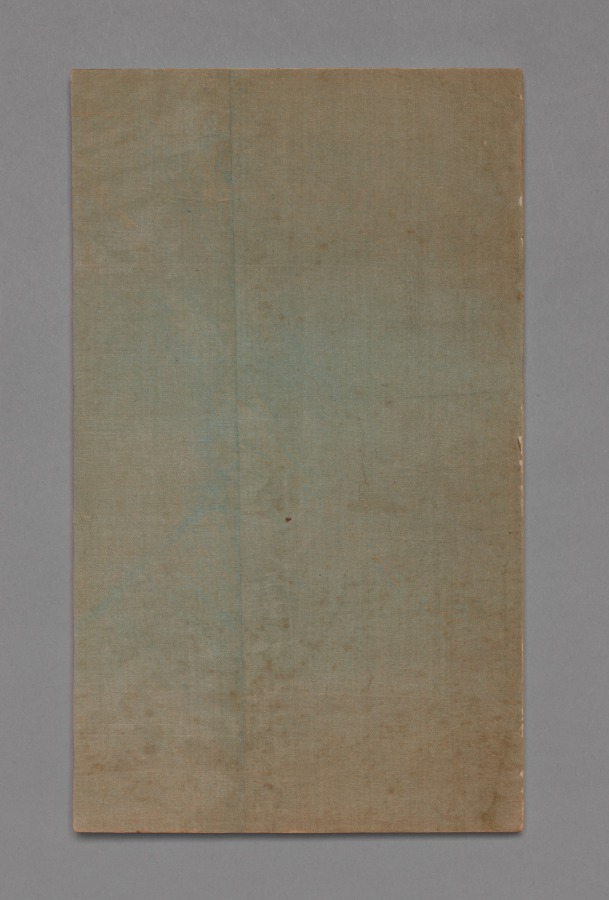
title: Ten Bamboo Studio Painting and Calligraphy Handbook (Shizhuzhai shuhua pu): Orchids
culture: China, Qing dynasty (1644-1911)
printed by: Hu Zhengyan (Chinese, c. 1584–1674)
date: 1633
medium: Woodblock-printed book; ink and colors on paper; first edition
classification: Print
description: Color printing reached a level of perfection in the early 1600s, as seen in this Ten Bamboo Studio Collection of Calligraphy and Painting and the Mustard Seed Garden Manual of Painting (printed 1679 and 1701). The painterly quality, precision in registering (aligning) the woodblocks, and harmonious colors made them the most successful color print editions in Chinese history. Both editions were printed and compiled in Nanjing, spread nationwide, and had a great impact on the arts in Japan and Korea.